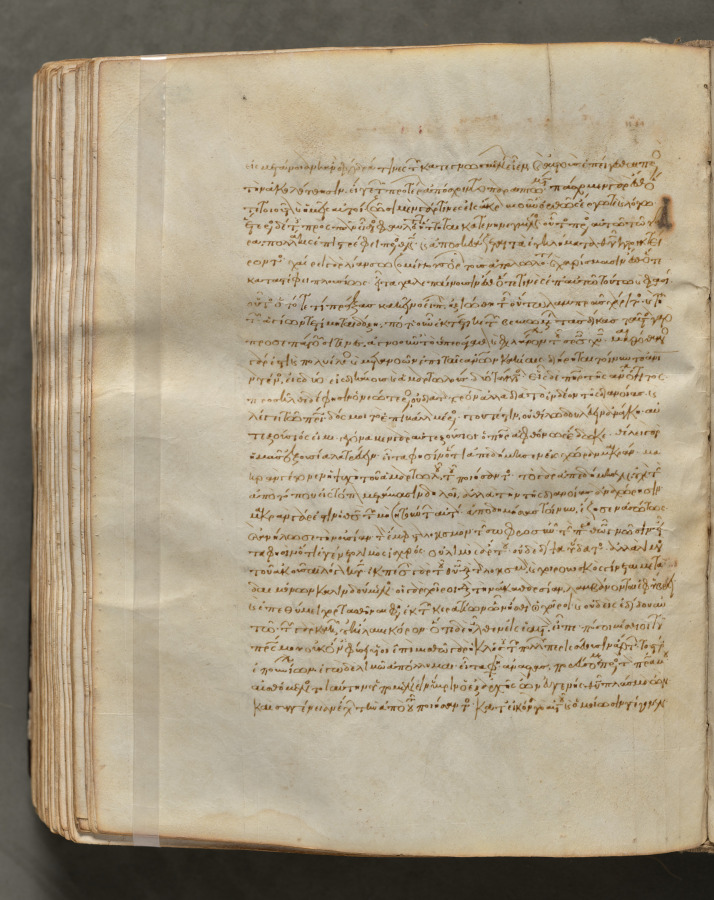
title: Text, folio 282 (verso), from a Gospel Book with Commentaries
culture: Byzantium, Constantinople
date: c. 1000–1100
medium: ink, tempera, and gold on vellum; leather binding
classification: Bound Volume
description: Each of the four gospels in this book opens on a page with brilliantly illuminated borders depicting the author of the text as well as birds—principally peacocks, symbols of the immortality of the soul—and fountains, representing the fountain of life and the salvation of the soul. This volume consists of 428 leaves with texts in Greek. Its level of sophistication suggests that it was probably written and decorated in a monastery in Constantinople.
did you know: Gospel books were carried in procession through Byzantine churches.